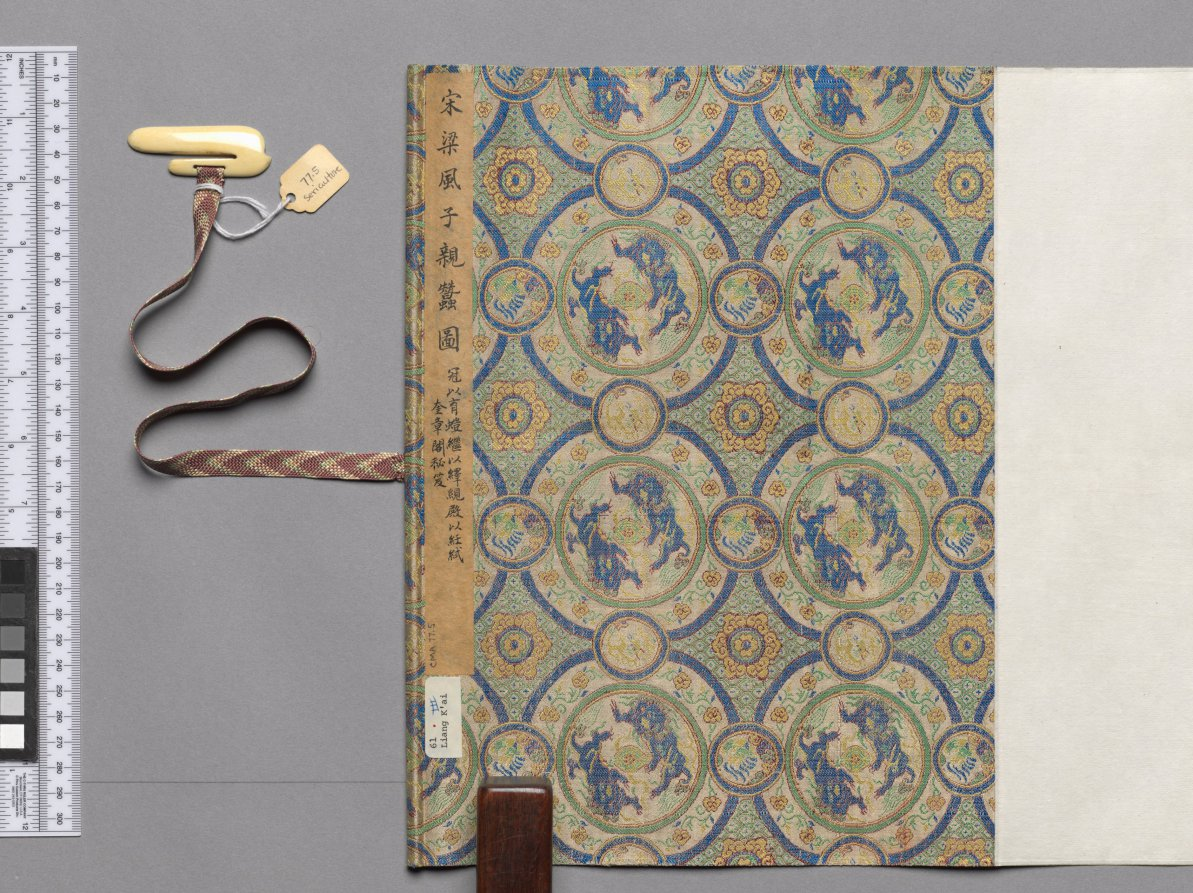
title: Sericulture (The Process of Making Silk)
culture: China, Southern Song dynasty (1127-1279)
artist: attributed to Liang Kai (Chinese, mid-1100s–early 1200s)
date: early 1200s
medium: Handscroll; ink and color on silk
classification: Painting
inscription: 3 colophons and 7 seals of Ch'eng Ch'i (20th c.).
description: By the Southern Song period, the economic center of the silk industry had shifted to the lower Yangzi delta, while the north continued to be troubled by wars. Divided into three sections, the handscroll illustrates 14 steps in the process of making silk, from the raising of silkworms to the weaving of silk cloth. The scroll’s scenes follow the illustrations of Lou Shou’s (1090–1162) Pictures of Tilling and Weaving (gengzhi tu), the first recorded painting of this genre, which was conceived in Hangzhou around 1145. However, in the Cleveland painting the artist groups several scenes of sericulture together under the roof of an open structure.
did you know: The painting is attributed to Liang Kai, a court artist active from about 1201 to 1204 at the Imperial Painting Academy in the city of Hangzhou, a major silk weaving center from that time to the present day.